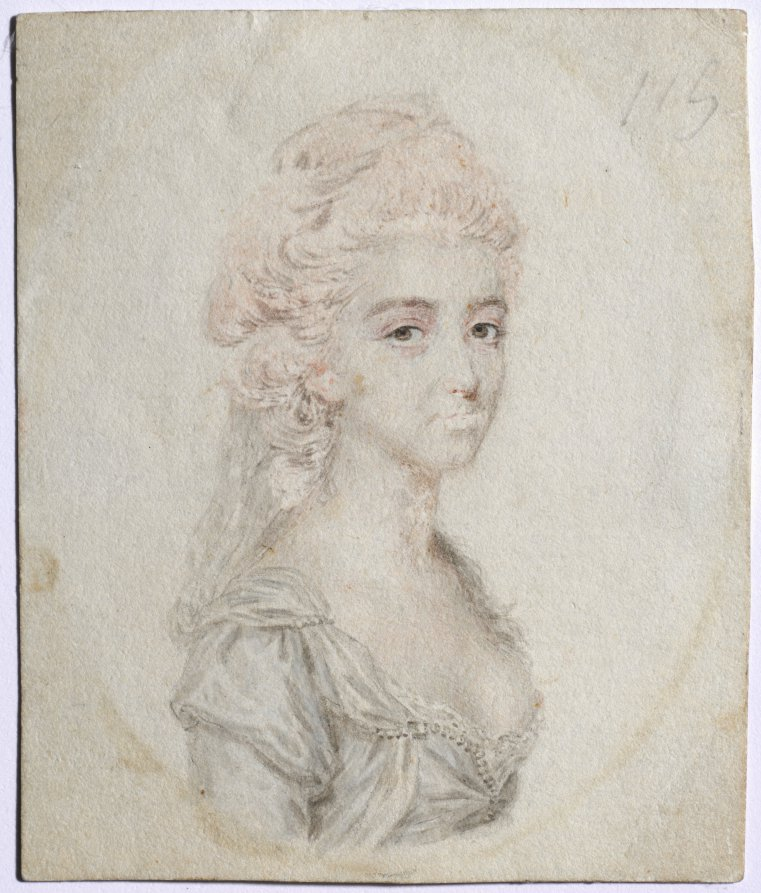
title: Portrait of a Woman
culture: England, 18th century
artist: John I Smart (British, 1741–1811)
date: c. 1776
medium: graphite and wash on laid paper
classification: Portrait Miniature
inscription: inscribed on front of paper at upper right corner: 119 (or 115?); inscribed on paper backing, in graphite, upside down at lower left: 10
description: Although it is impossible to say if it was always part of the artist’s process to execute a preparatory sketch prior to painting each miniature, we do know that John Smart retained many hundreds of these sketches. A group of preparatory sketches—of which this portrait is one—descended through the Smirke family after Smart’s daughter Sarah gave a sketchbook containing preparatory portrait studies to her friend Mary Smirke, sister of the celebrated Victorian architect Sydney Smirke. This book was probably broken up around 1877 when it was divided between Sydney’s daughters Mary Jemmett and Mrs. Lange, whose portions were both sold at auction in 1928. Compared to his contemporaries George Engleheart (1752–1829) and Andrew Plimer (1763–1837), whose female sitters were often painted in similar simple white gowns, Smart often lavished more attention on the costumes in his portraits of women, whose dresses incorporated colored silks, printed fabrics, and luxury trimmings like lace and fur. The sitter’s head and shoulders face left. She has what was probably once blond hair—now faded to pink—dressed high on her head, with curls down the back of her neck, over which a veil descends. Her eyes are hazel, and the color of her lips has almost completely faded. Positioned in an oval, and revealing much of her left breast, she wears a low-necked dress with faint traces of pink pigment, trimmed with a string of pearls. The background is unpainted. To this date, the finished ivory for which this preparatory sketch was presumably undertaken has not been discovered. The portrait was assigned the historically colorful but fictitious title of “Henrietta Maria” at some point after memory of its true identity had been lost. Giving illustrious titles to portraits of unknown sitters was a popular strategy adopted by dealers during the nineteenth and twentieth centuries, often applied to miniature portraits and, in particular, to Smart’s sketches of women. In 1948 Arthur Jaffé wrote to the Cleveland Museum of Art that a “Mrs. Samuelson of Exeter recently brought me two frames, with six sketches mounted in each, of ladies, mostly with fancy names. I think there is no doubt that they were part of Mrs. Lange’s share of the Smirke sketches, though unlike yours they did not pass through Christie’s auction in Dec. 1928. I persuaded Mrs. Samuelson to let me remove them from their frames and to rub the paper backing from the card on which the sketches are painted. The result was as follows. Included was a No. 115 called, Margaret, Archduchess of Austria, which is the same number given to our Henrietta Maria.” Elsewhere Jaffé notes that the number on the front of this sketch was probably a 119 instead of a 115.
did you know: Sketches helped John Smart work out the particulars of a portrait before commencing the miniature on ivory; they were useful in the event that a duplicate might later be required.